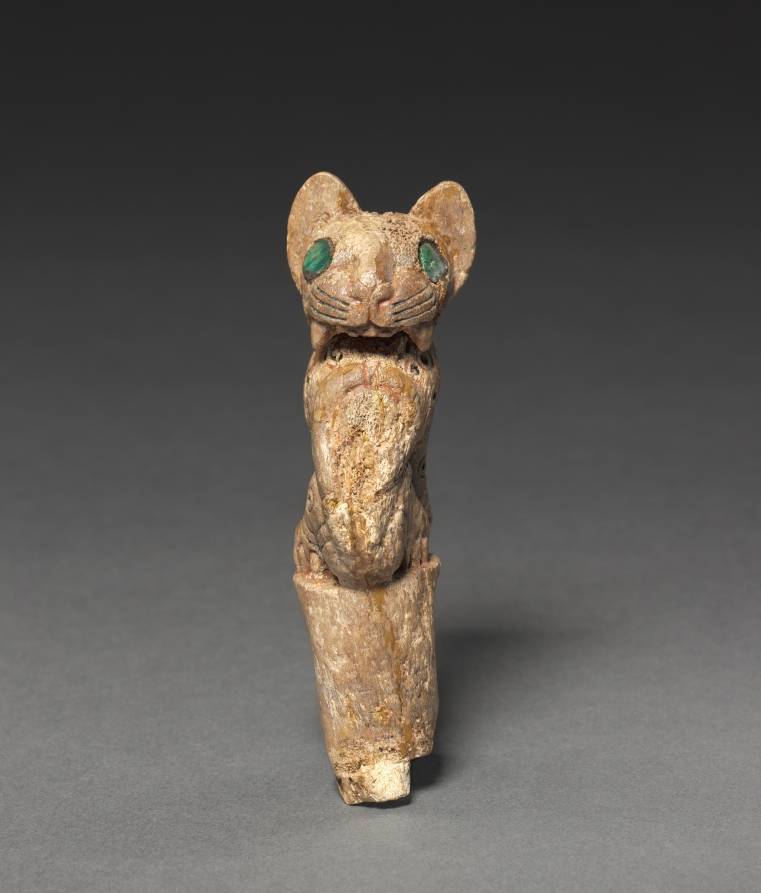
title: Handle of a Throwing Stick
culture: Peru, South Coast, Tiwanaku style, 400-1000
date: c. 700–900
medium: bone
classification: Arms and Armor